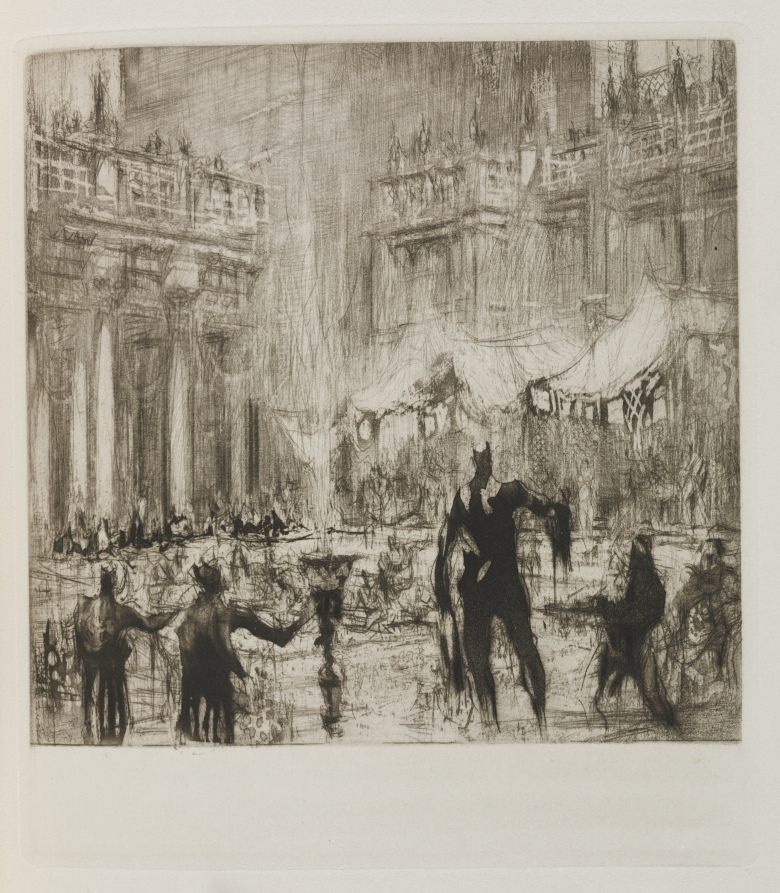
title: Herodias: Page 45, But now beginning at the farthest end of the banquet hall a murmur of surprise and admiration. A young girl began to enter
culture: England, 20th century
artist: William Walcot (British, 1874–1943)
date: 1928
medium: etching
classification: Print